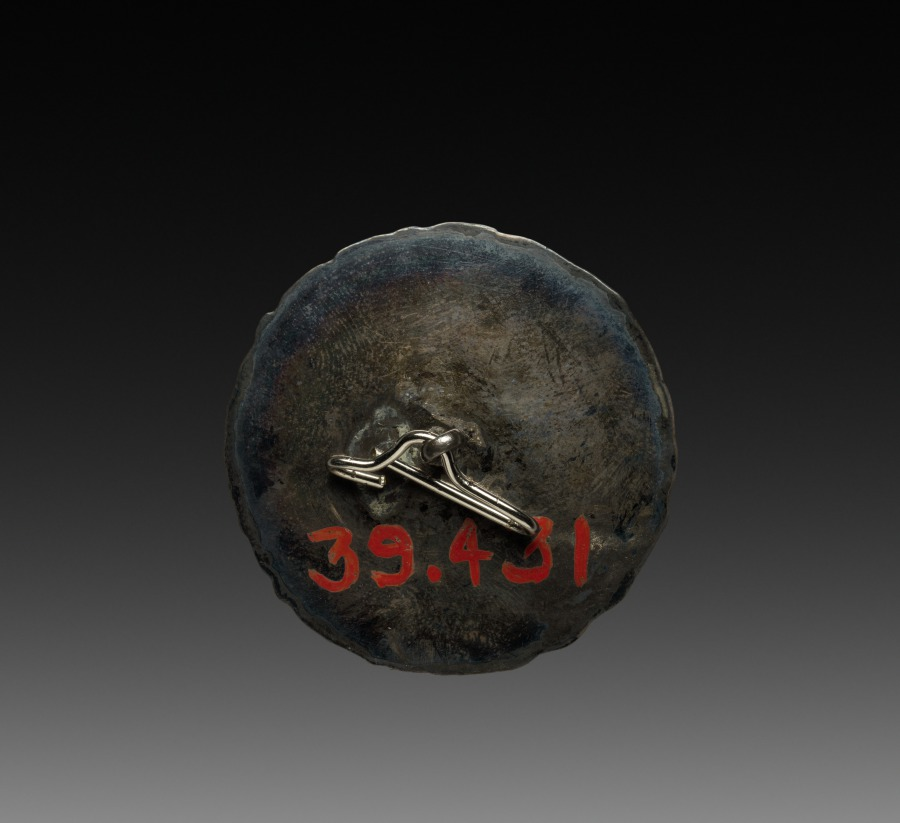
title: Button with Dragon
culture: Japan, Meiji period (1868–1912) to Taishō period (1912–26)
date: early 1900s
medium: One of a set of six buttons; cast (?) silver with relief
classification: Metalwork